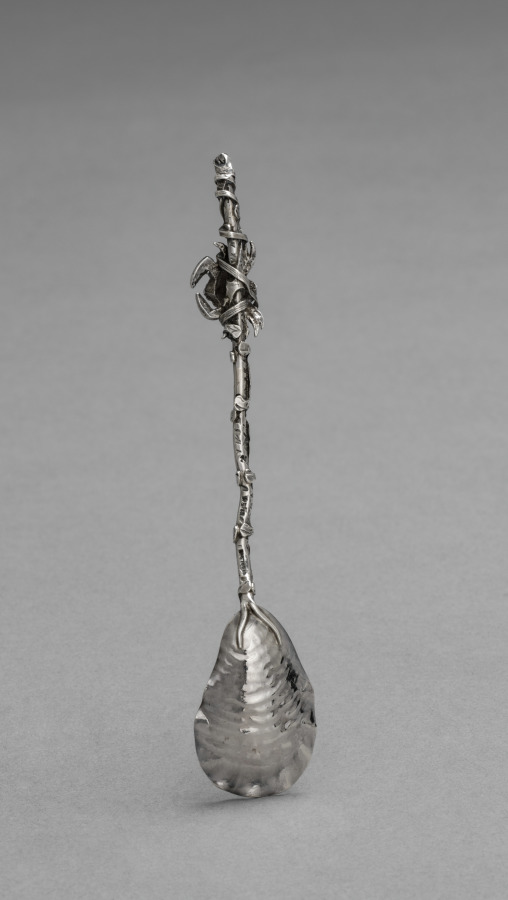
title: Seashell Salt with Shell and Crab Spoon (Spoon)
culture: America, Rhode Island, Providence, 19th century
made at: Gorham Manufacturing Company (America, est. 1831)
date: 1884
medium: handwrought sterling silver, partially gilt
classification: Silver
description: This small salt dish and spoon reflect the late 19th-century interest in incorporating naturalistic details into the design of useful pieces-in this instance probably inspired by Japanese examples.